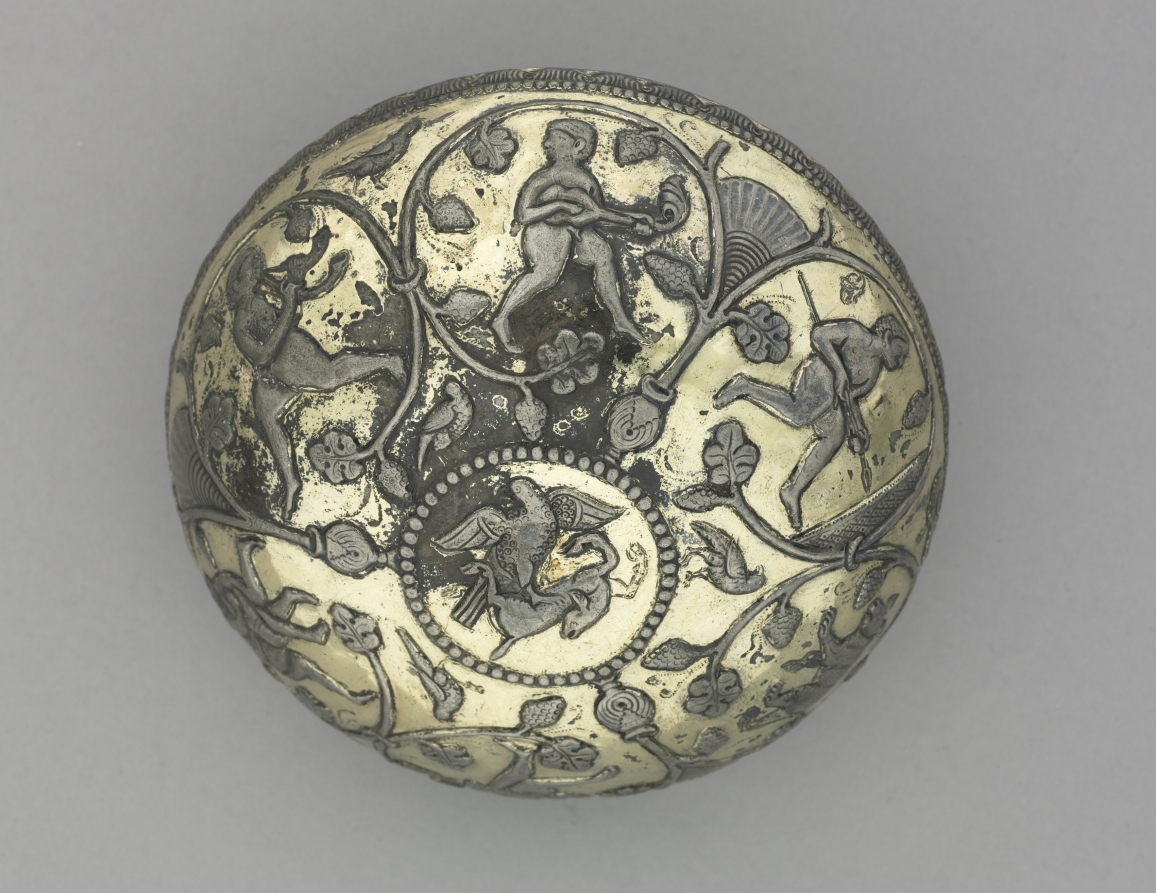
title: Bowl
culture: Iran, Sasanian Empire (224–651 CE)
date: 500–700 CE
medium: silver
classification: Metalwork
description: Every good Zoroastrian was supposed to spend one-third of his day farming; one-third philosophizing; and one-third eating, resting, and at pleasure. The abundance of Sasanian luxury goods is evidence of the importance accorded the last third of the day.